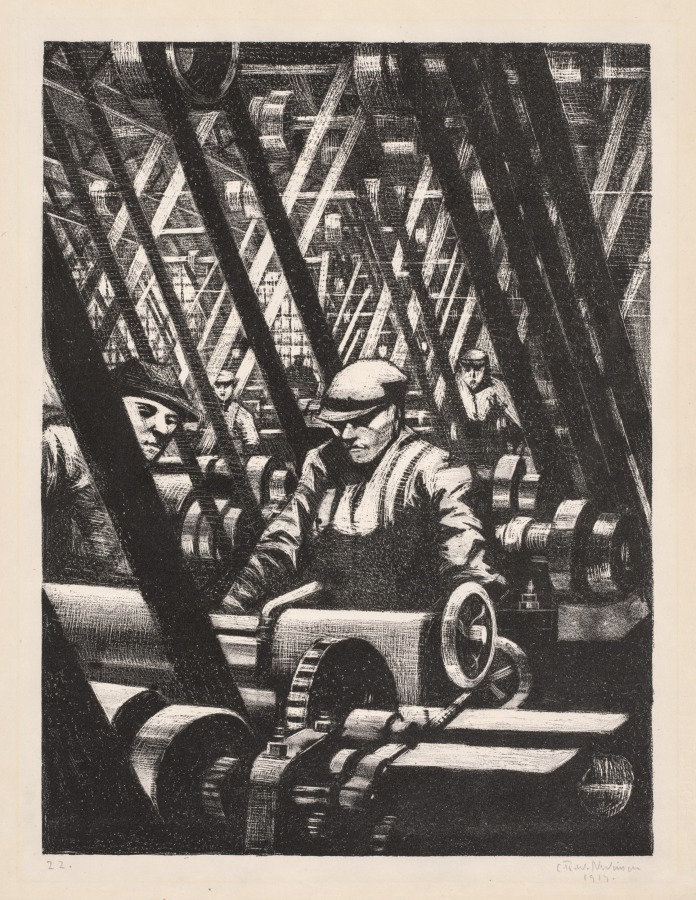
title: Building Aircraft: Making the Engine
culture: England, 20th century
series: The Great War: Britain's Efforts and Ideals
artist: Christopher Nevinson (British, 1889–1946)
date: 1917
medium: lithograph on wove paper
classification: Print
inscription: In graphite at lower right below image: “C.R.W. Nevinson / 1917.”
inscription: In graphite at lower left below image: “22.”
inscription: In graphite at lower left on recto: “14 [?]”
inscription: Stamped in brown (possibly formerly black) at lower right on recto: “Made in England”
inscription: Watermark: on verso at lower left and upper left: “HOLBEIN”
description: The British government commissioned Christopher Nevinson to create this print, part of a series of six, during World War I. By depicting the manufacture and use of airplanes in England, Nevinson represented the motivations and goals of war to a broad public. This image emphasizes the intense focus and strength required to build an engine. Diagonals and geometric shapes throughout suggest the efficiency and velocity of modern manufacturing.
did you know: This print belongs to a series commissioned by England’s Bureau of Information during World War I.